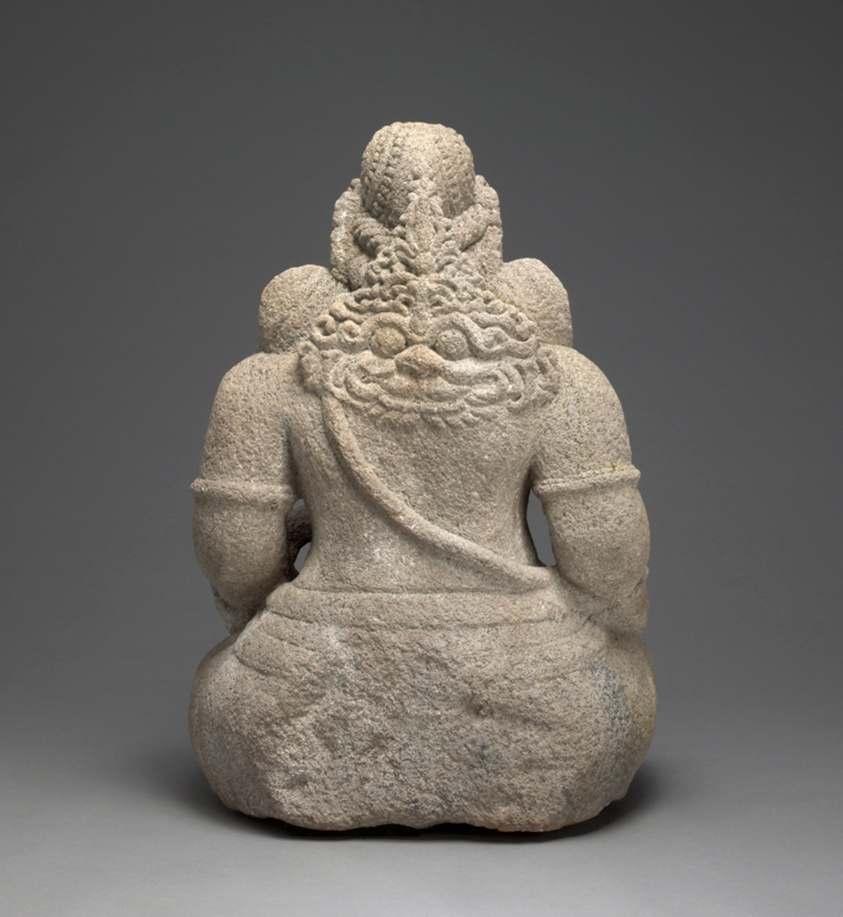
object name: Sculpture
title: God Ganesha, Remover of Obstacles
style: Southeast Asian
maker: Indonesia; Central Java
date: 9th/10th century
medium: Andesite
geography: Central Java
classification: stone (unidentified); stone; sculpture; asian art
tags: Ganesha, gods (deities), religion